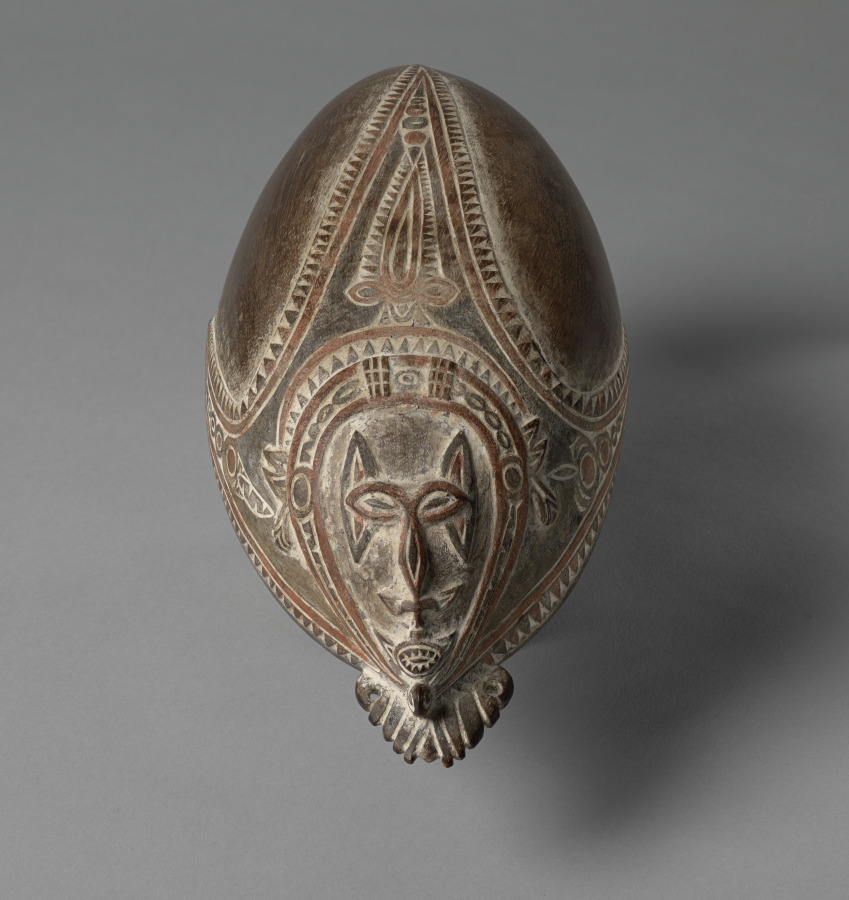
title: Bowl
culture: Melanesia, Papua New Guinea, Huon Gulf, Tami Islands, 19th century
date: 1800s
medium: painted wood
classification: Sculpture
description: The people of the Tami Islands manufactured canoes, house beams, drums, bowls, lime spatulas, and neckrests using tools such as stone axes, bamboo knives, tree-bear teeth, and pig, cassowary, and dog bones. Tami bowls were carved from the hard wood of the azalea and decorated with patterns that vary from deep etching to high relief. Many bowls were blackened with a graphite compound and highly polished. Decorative patterns were owned by specific families, and could not be used by other carvers.